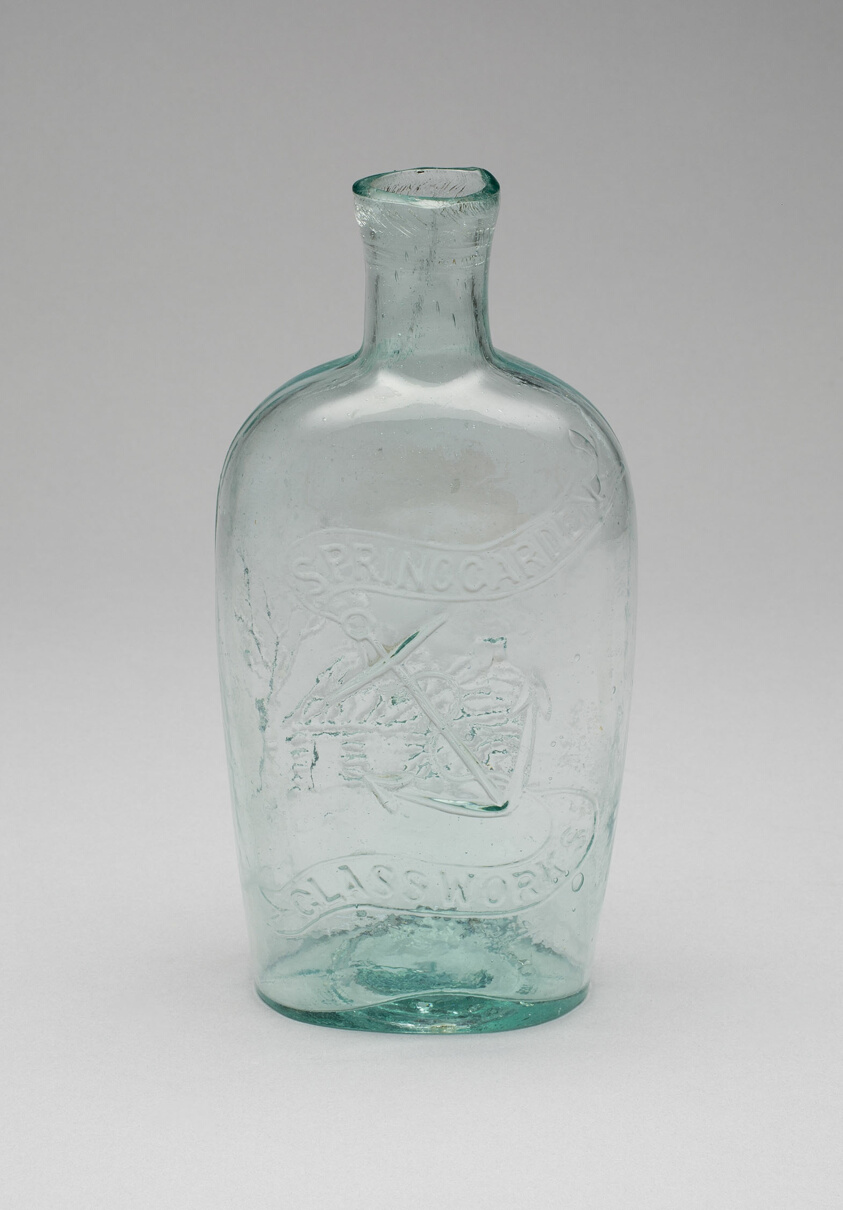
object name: Glass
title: Flask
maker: Spring Garden Glass Works; American, 1851–1856; Baltimore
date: 1850–59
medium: Glass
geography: Baltimore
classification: flask (bottle); american decorative arts; glass (object genre); decorative arts